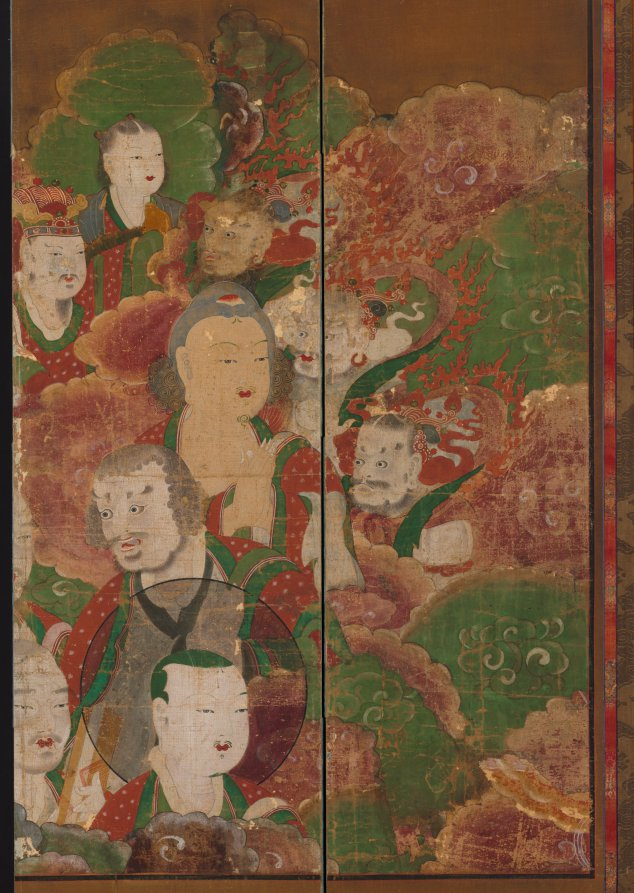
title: Buddhist Deities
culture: Korea, Joseon dynasty (1392–1910)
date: 1700s–1800s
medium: Four-panel folding screen; ink and color on silk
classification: Painting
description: This painting is a fragment of a much larger banner painting, now preserved by mounting on a four-panel continuous folding screen. On the back are Buddhist sutra pages, with text written in gold ink on indigo dyed paper.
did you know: This painting is a fragment of a much larger banner painting.